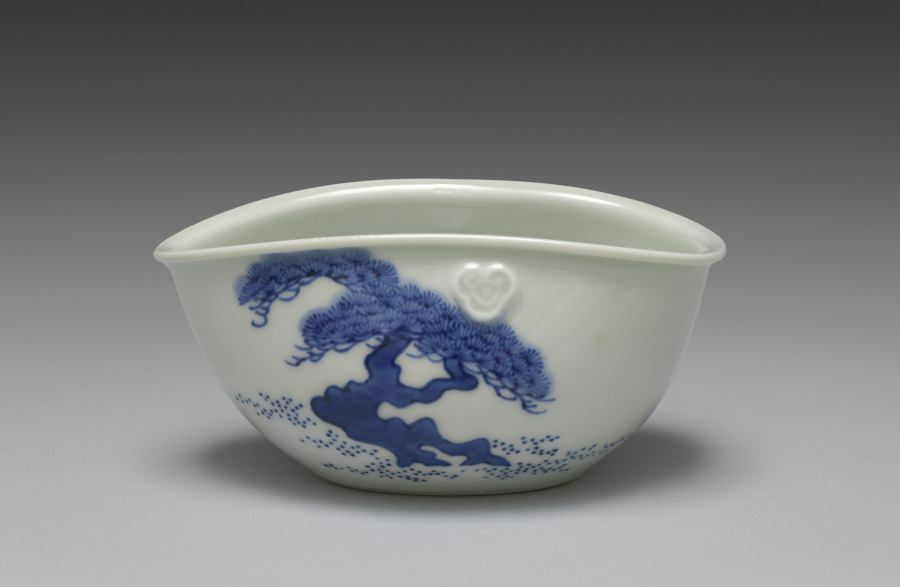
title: Water Cooler with Pines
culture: Japan, Meiji period (1868–1912)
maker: Seifū Yohei III (Japanese, 1851–1914)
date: 1893–1914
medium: Porcelain with underglaze blue and molded designs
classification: Ceramic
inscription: The center of the base contains an ovoid “Seifu” seal.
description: Hot water coolers, or yuzamashi, are essential components of sencha tea sets. Yuzamashi are used to cool boiled water to the ideal temperature for the type of tea to be brewed. The kidney-like shape of this one permits it to be cradled in one hand, following curvature of the palm, with the tips of the thumb and index finger each pressed against a nyoi staff-head-shaped applied form, perfectly placed to ensure a stable hold. Someone pinching the cooler in this way would have enough protection from the heat to maintain a steady grip but also sufficient contact along the base of thumb to assess the water temperature. On each of the cooler’s two longer sides, a pine tree in grass or sand is painted under the glaze in cobalt blue. The tree on one side has two main roots and two large branches, while that on the other has a single, thick, curved line from root to tip with racks of needles spreading across the width of the sky. A blue oval is traced along the footring, and the center of the base contains an ovoid “Seifu” seal.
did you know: Evergreen, pines have associations with eternal youth and longevity.